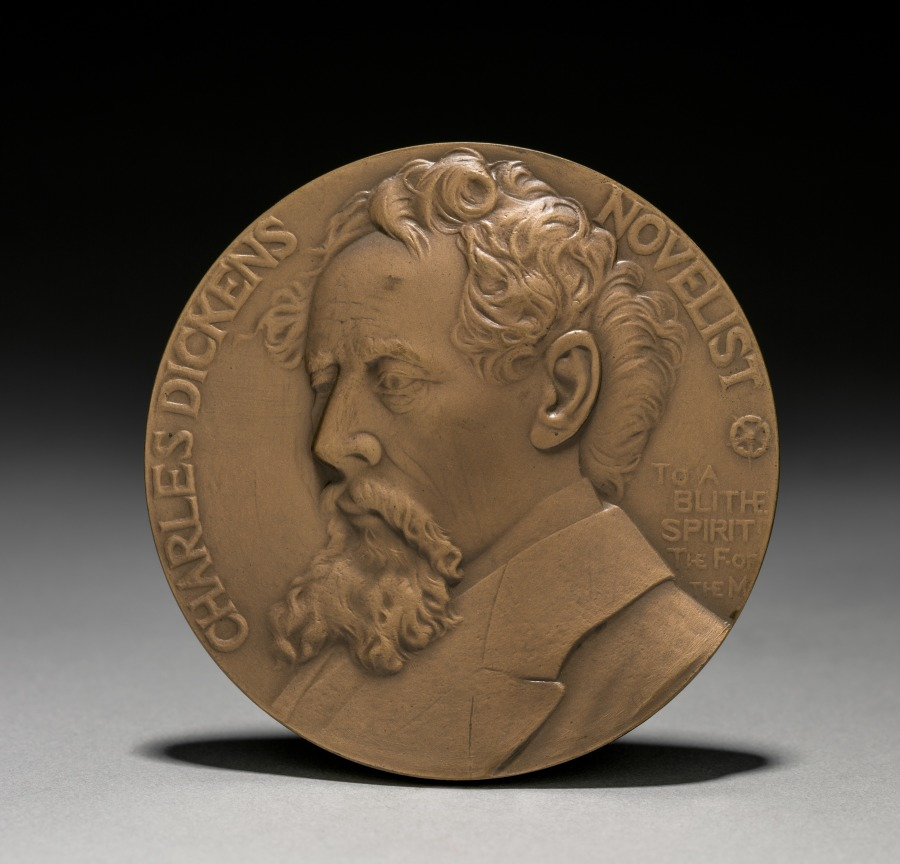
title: Medal: Charles Dickens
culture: America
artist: John Severinus Conway (American, 1852–1925)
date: 1912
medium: bronze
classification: Metalwork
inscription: "CHARLES DICKENS NOVELIST. TO A/BLITHE/SPIRIT/THE F OF/ THE M."